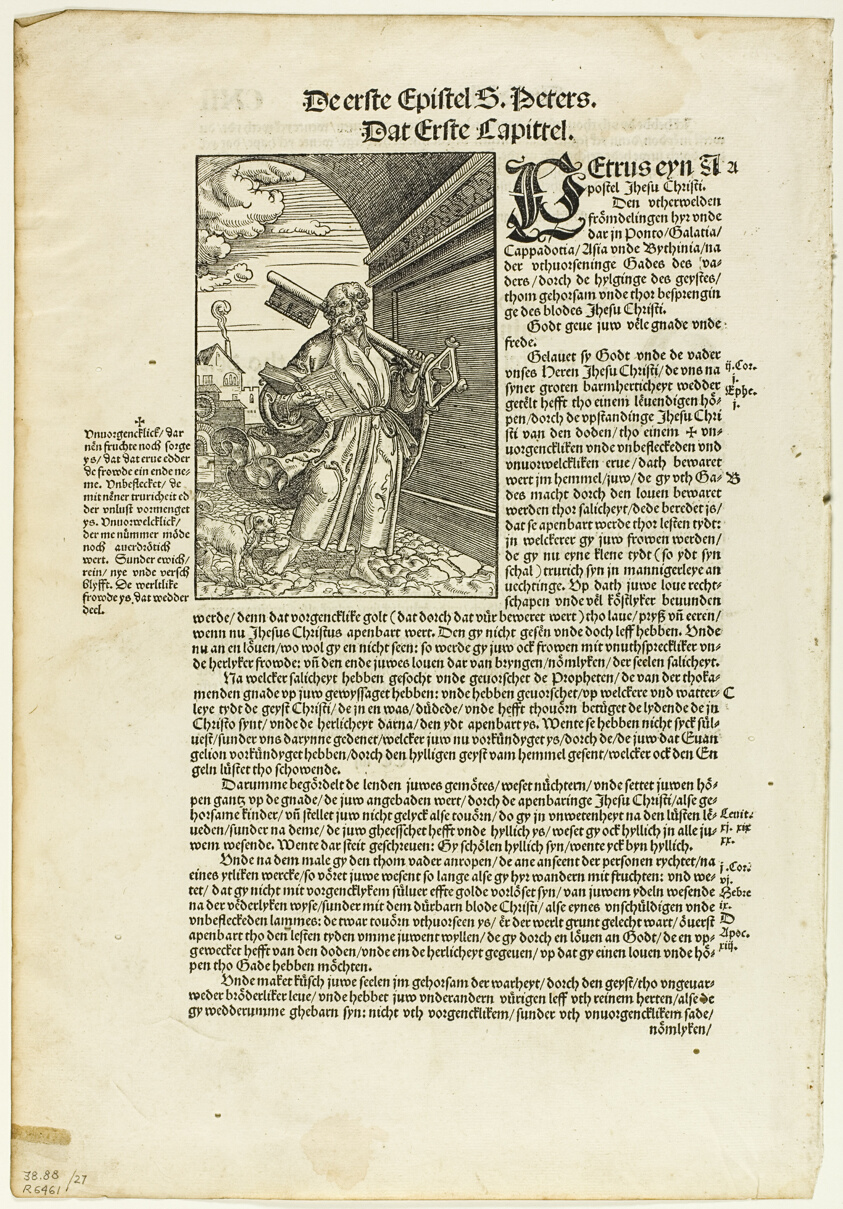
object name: Print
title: St. Peter from De Biblie vth der vthlegginge Doctoris Martini Luthers, plate 27 from Woodcuts from Books of the XVI Century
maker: Erhard Altdorfer (German, c. 1485-1561); original text German Bible translation by Martin Luther (1483-1546); portfolio text by Max Geisberg (Swiss, 1875-1943)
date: 1534, assembled into portfolio 1937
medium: Woodcut and letterpress in black on cream laid paper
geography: Germany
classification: woodcut; print; prints and drawing